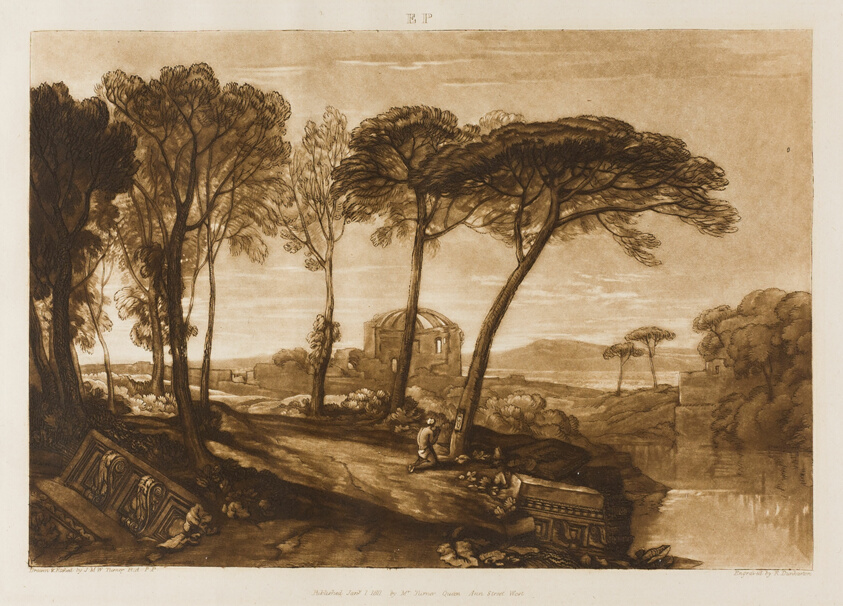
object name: Print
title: The Temple of Minerva Medica, plate 23 from Liber Studiorum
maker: Joseph Mallord William Turner (English, 1775-1851); Engraved by R. Dunkarton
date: Publishd January 1, 1811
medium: Etching and aquatint on off-white paper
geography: England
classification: etching; print; prints and drawing